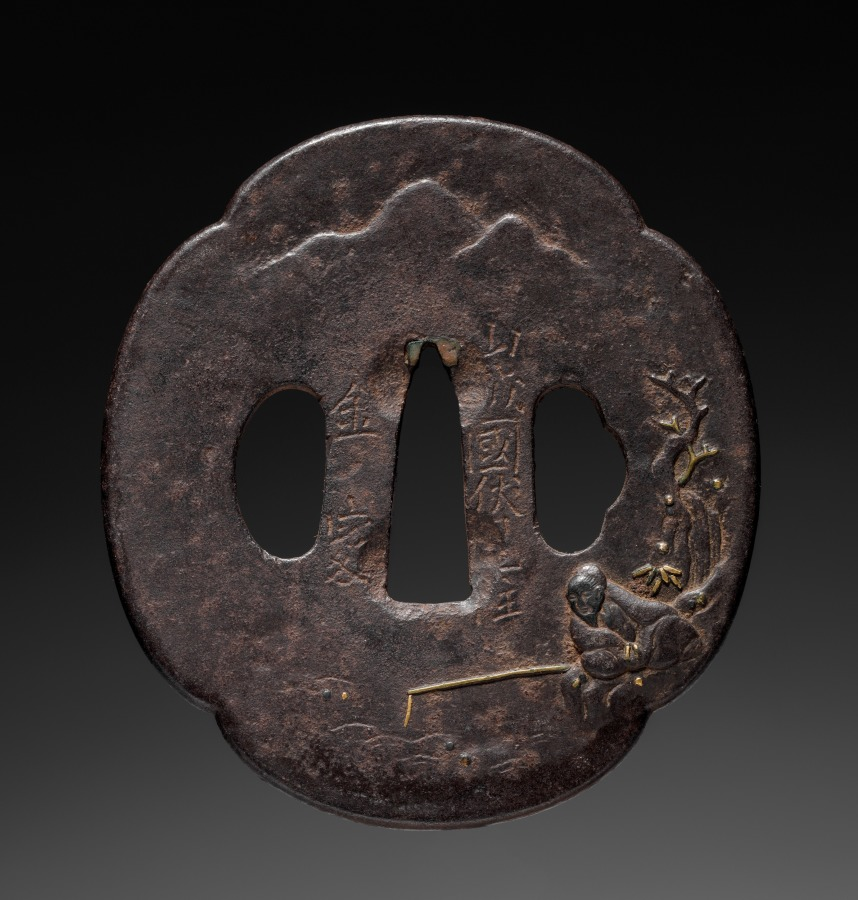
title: Sword Guard (Tsuba) with Fishing Sage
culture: Japan, Edo period (1615–1868)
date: late 1600s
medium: iron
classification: Arms and Armor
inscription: signed: 山城國伏見住金家